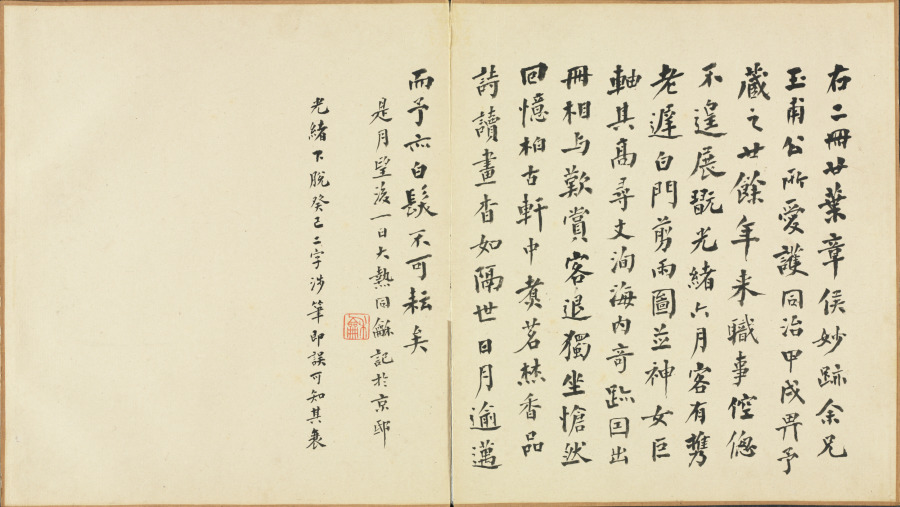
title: Paintings after Ancient Masters: Calligraphy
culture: China, Ming dynasty (1368–1644)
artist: Chen Hongshou (Chinese, 1598/99–1652)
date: 1598–1652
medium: album leaf, ink and color on silk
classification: Painting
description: The twenty paintings in this double album by Chen Hongshou include landscapes, figures, and flowers. It also has one leaf featuring a woman, an often-used subject not found in the other albums from the latter part of his career. His late works are wonderful summations of Chen's peculiar and quirky art—archaistic, hyper-refined—but without accompanying shallowness or sentimentality. His figures and landscapes in the late albums are miniaturized, not unlike the small Chinese gardens, or the carefully selected small table rocks or old roots used for contemplation to see the world in miniature. This loss of scale is quite deliberate and reflects the psychological situation of a depressed class like the Ming loyalist officials and scholars, deprived of their integrity and honor, and forced to lead a diminished and restricted existence.